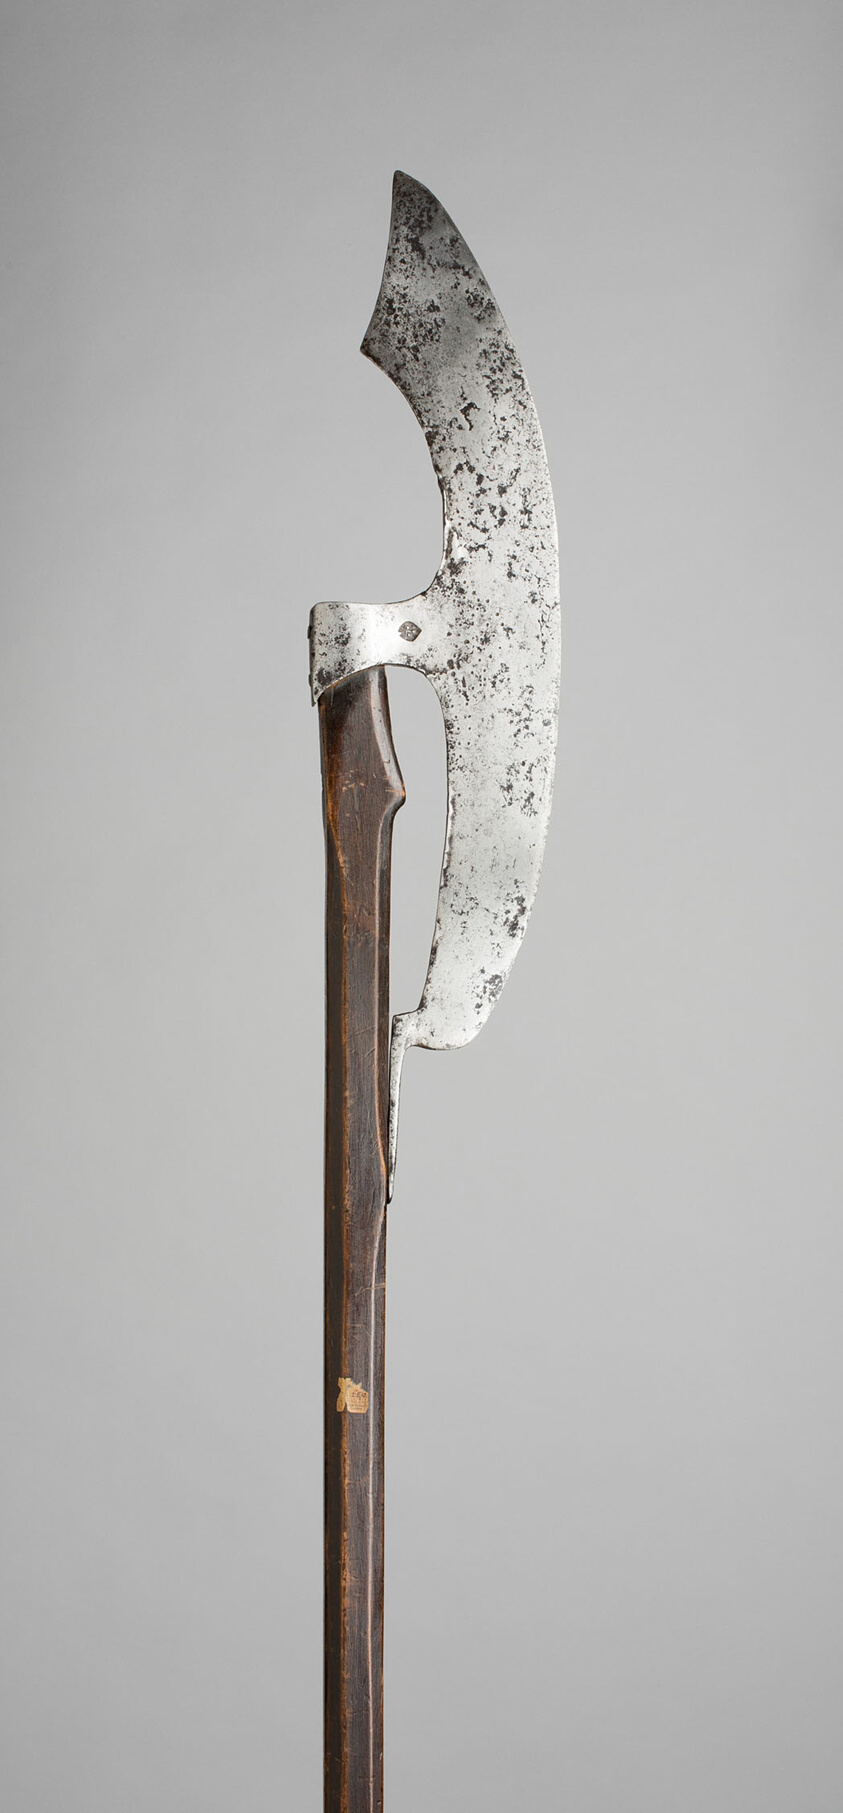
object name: Arms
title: Berdysh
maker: Eastern European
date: 1500/1700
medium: Steel and wood (ash)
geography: Eastern Europe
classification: edged weapon-staff; arms; arms and armor